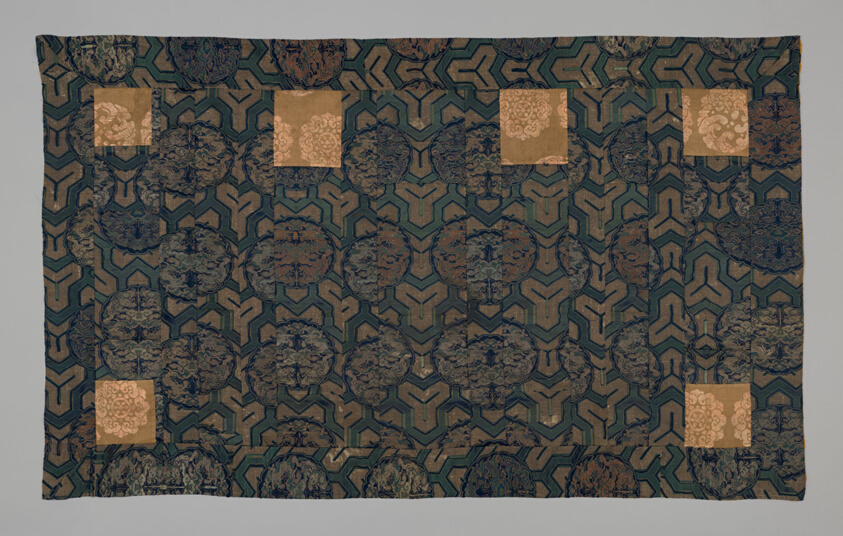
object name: Textile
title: Kesa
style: late edo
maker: Japan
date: late Edo period (1789–1868), 1781/1801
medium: Hiri, yô, jô: silk and gold-leaf-over-lacquered-paper strip, satin weave with twill interlacings of secondary binding warps and patterning wefts; shiten: silk and gold-leaf-over-lacquered-paper-strip, twill weave with plain interlacing of secondary binding warps and patterning wefts; lining: silk, satin damask weave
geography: Japan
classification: textile; weaving; liturgical - buddhist